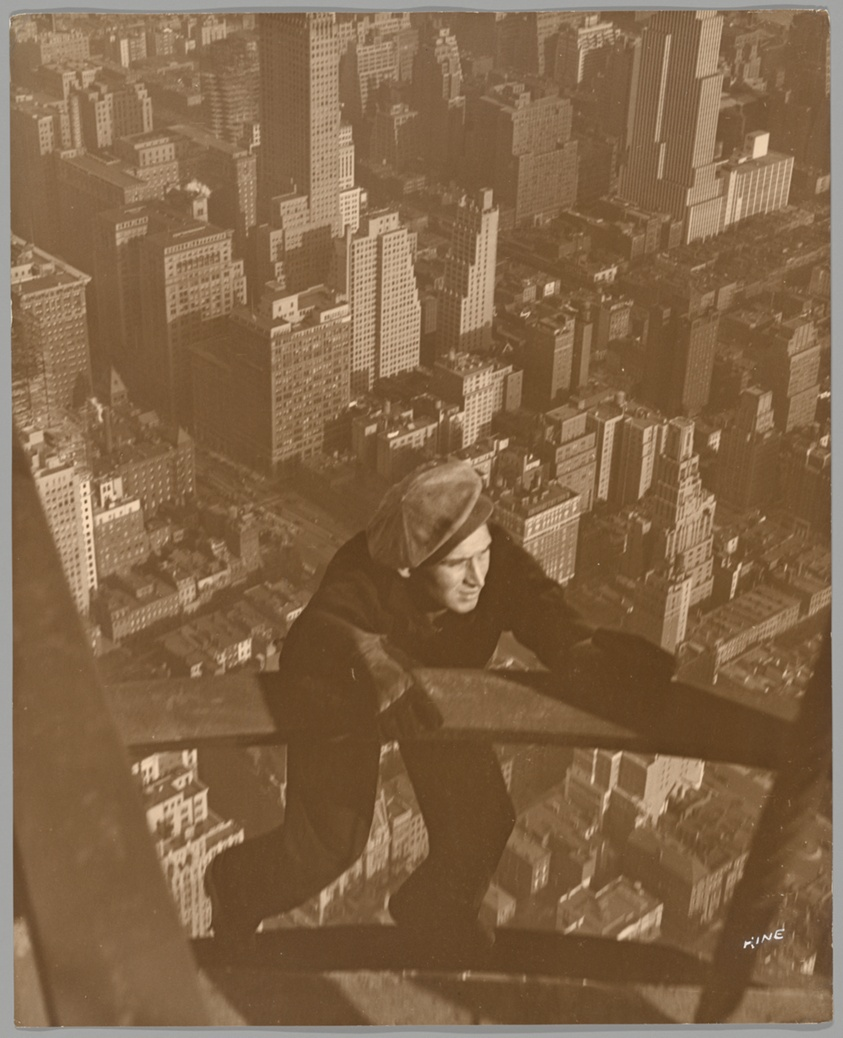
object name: Photograph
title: Climbing up the Beams on the Empire State-100 Stories Up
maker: Lewis Wickes Hine (American, 1874–1940)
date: 1931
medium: Gelatin silver print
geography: United States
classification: gelatin silver (developing-out-paper) pr; photographic process; photography; photograph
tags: cityscapes, documentary